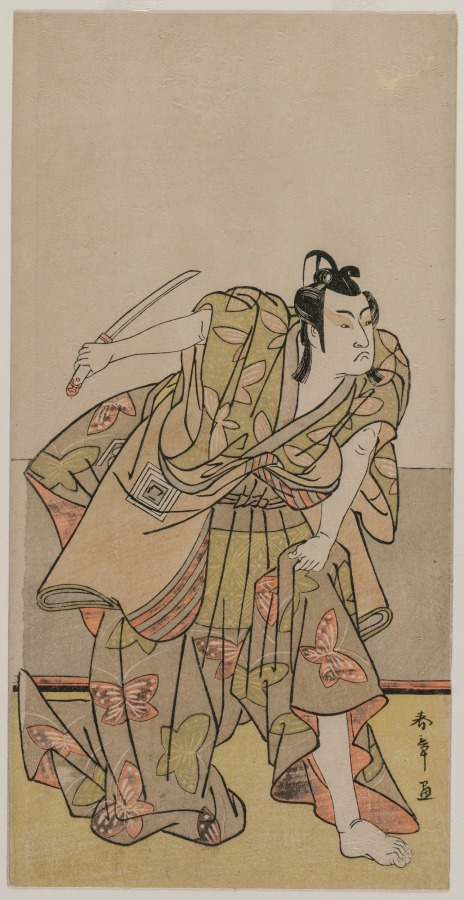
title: Ichikawa Monnosuke II as Soga no Goro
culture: Japan, Edo period (1615–1868)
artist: Katsukawa Shunshō (Japanese, 1726–1792)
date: c. late 1770s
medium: color woodblock print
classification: Print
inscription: Signature: Shunsho ga